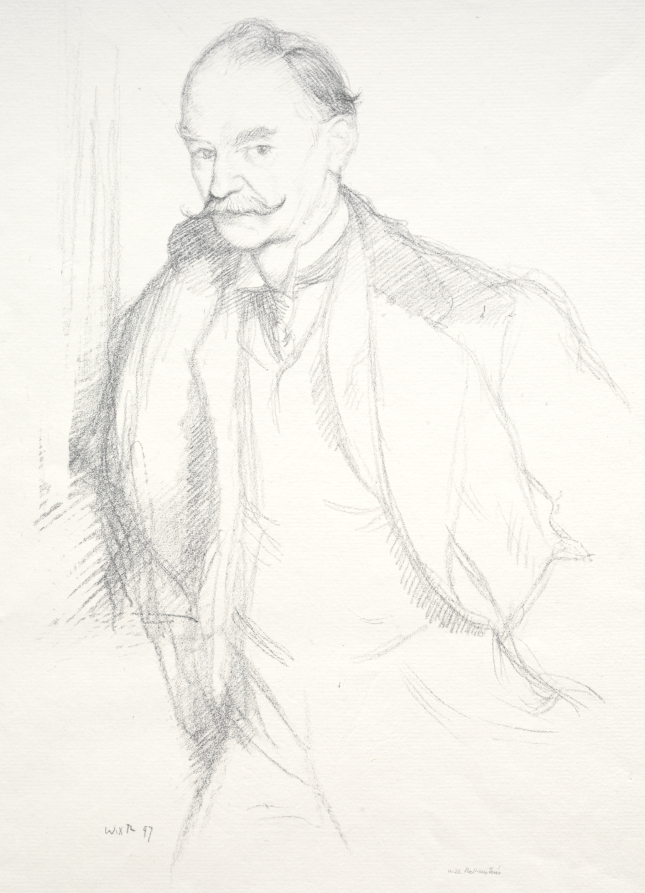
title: Thomas Hardy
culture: England, late 19th Century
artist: William Rothenstein (British, 1872–1945)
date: 1897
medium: lithograph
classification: Print